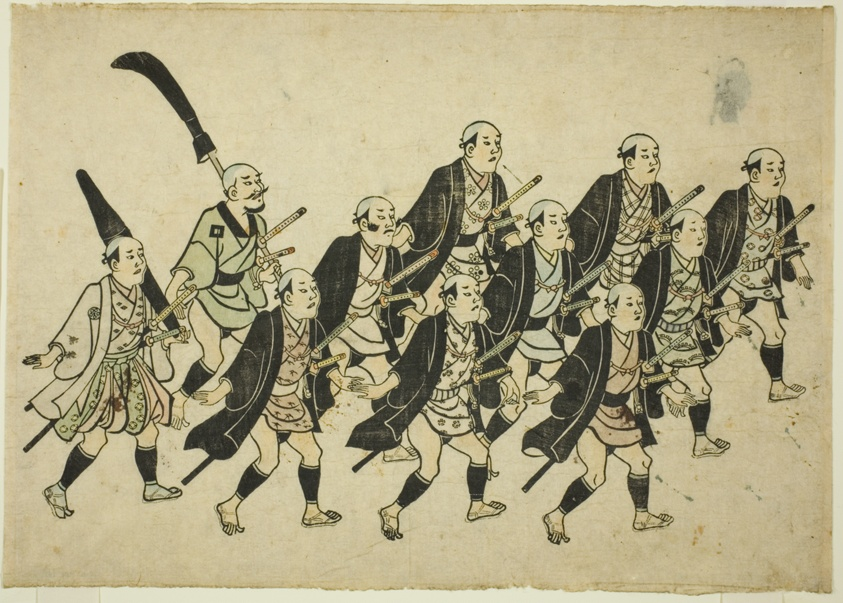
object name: Print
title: Procession of a Daimyo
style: Japanese (culture or style)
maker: Hishikawa Moronobu (Japanese, (?)-1694)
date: c. 1681/84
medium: Hand-colored woodblock print; oban yoko-e, sumizuri-e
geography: Japan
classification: woodblock print; print; asian art